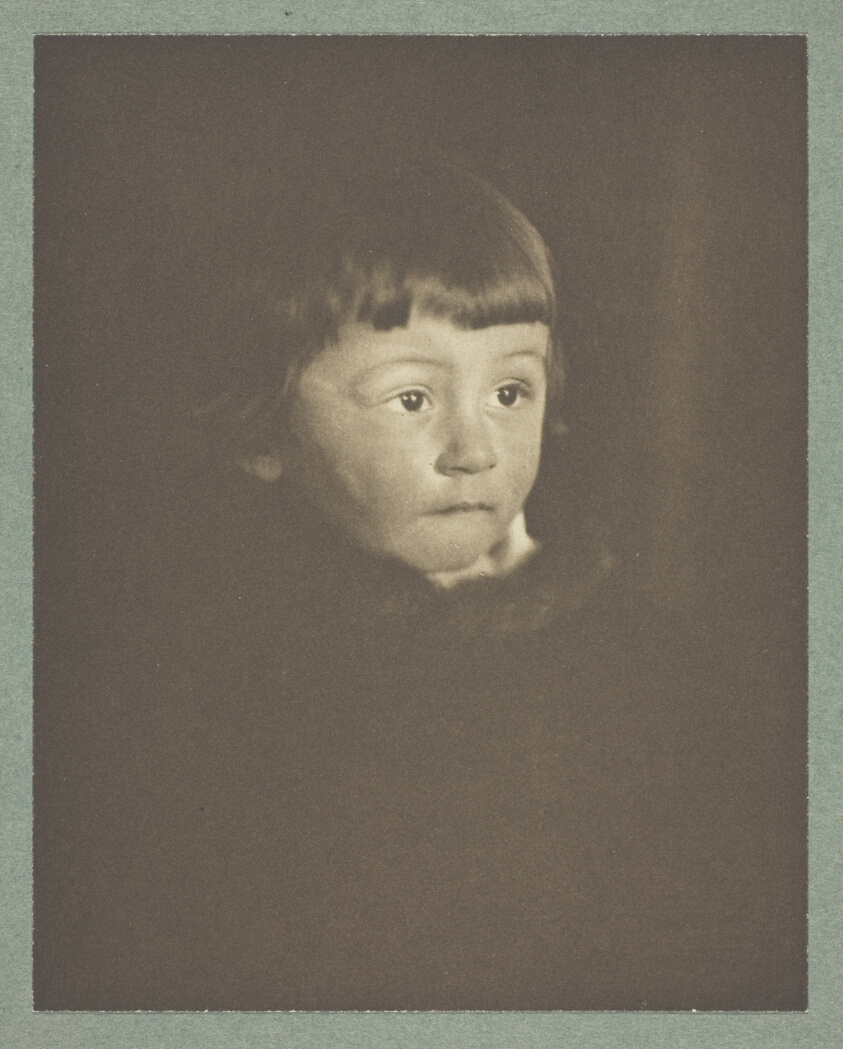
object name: Photograph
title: Portrait of a Boy, No. 10 from the portfolio "American Pictorial Photography, Series I" (1899); edition 146/150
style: Pictorialism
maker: Gertrude Käsebier (American, 1852–1934)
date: 1897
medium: Photogravure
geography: United States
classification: photogravure; photomechanical process; photography; photograph